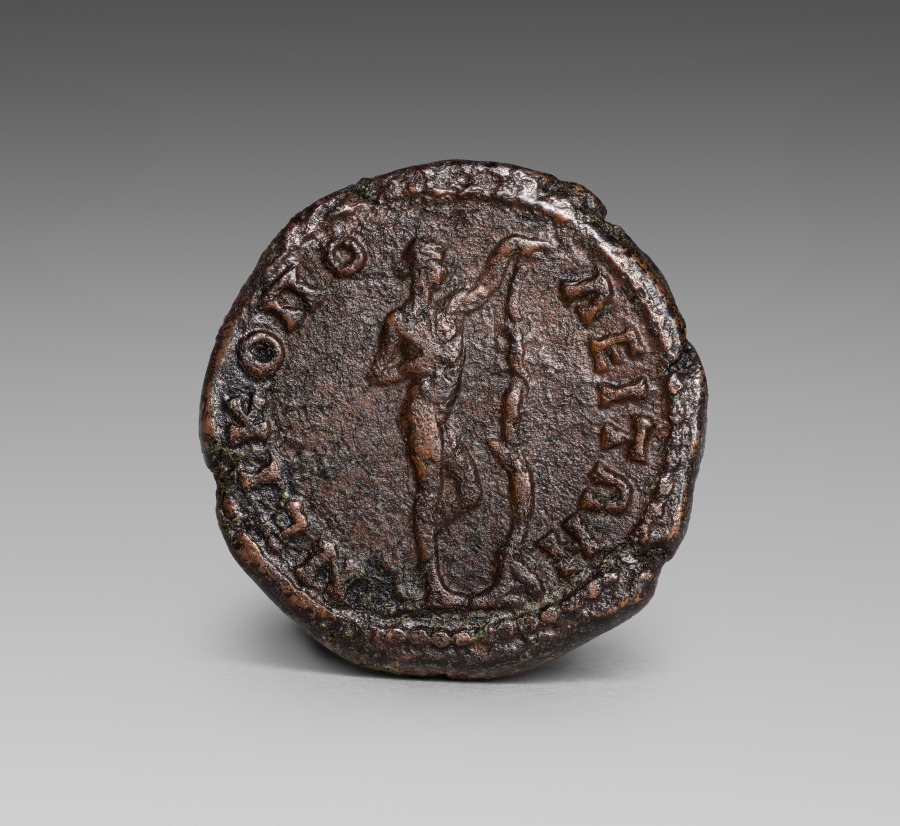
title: As: Apollo Sauroktonos, Tree (reverse)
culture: Roman, minted at Nikopolis He Pros Istron (Moesia Inferior)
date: 138–61 CE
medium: bronze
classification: Coins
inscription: ΝΕΙΚΟΠΟ - ΛΕΙΤΩΝ